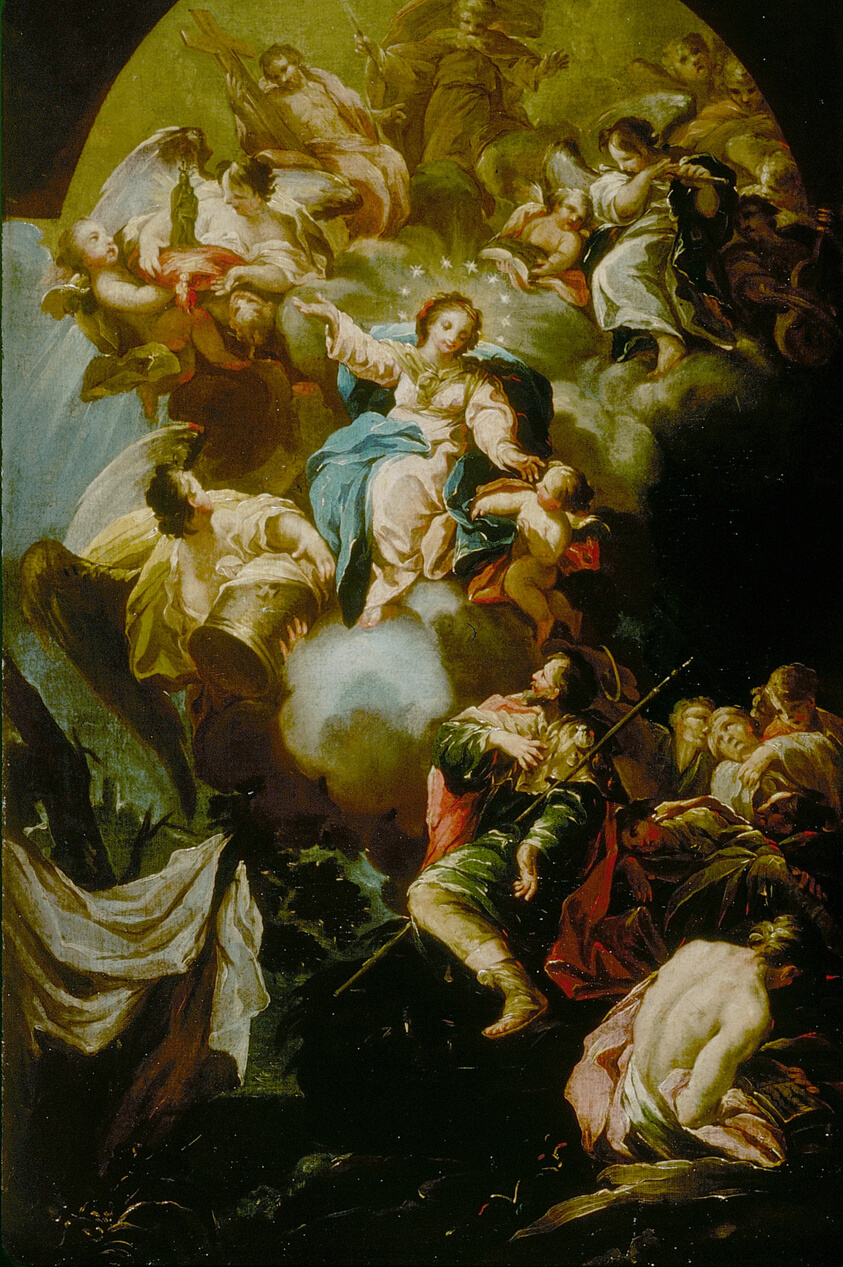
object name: Painting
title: Saint James's Vision of the Virgin of the Pillar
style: 18th Century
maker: Attributed to Antonio González Velásquez (Spanish, 1723–1794)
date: c. 1750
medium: Oil on canvas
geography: Spain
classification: oil on canvas; oil paintings (visual works); paint; spanish; painting; european painting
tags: saints, religious scenes, religious figures, religious, Christianity, Christian subjects, women, men, people, figures, angels, column, Virgin Mary